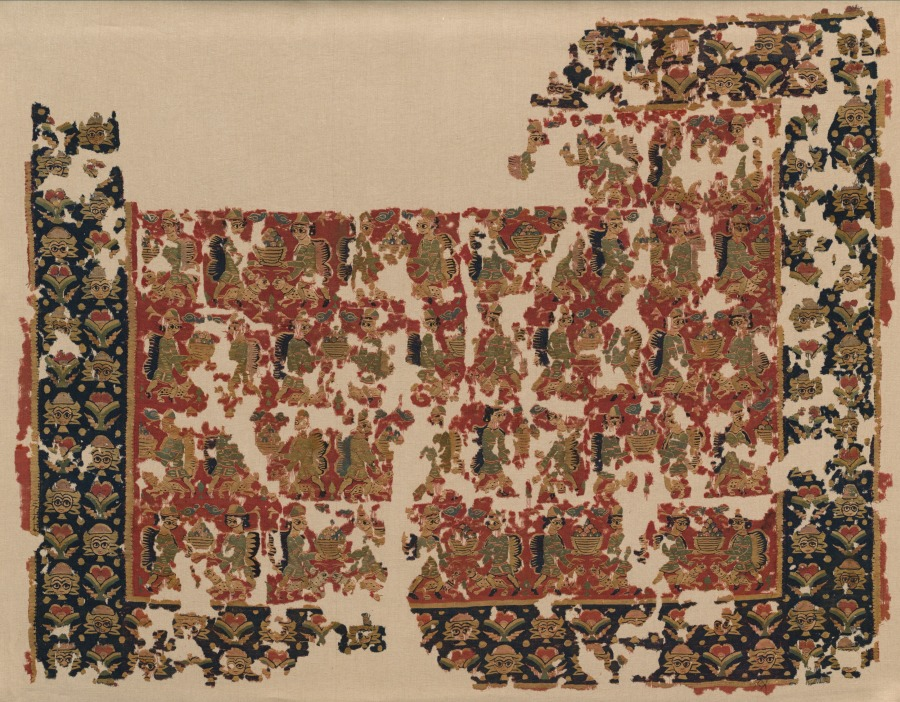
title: Fragment of a Large Hanging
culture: Egypt, Antinoë, Byzantine period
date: 500s CE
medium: tapestry weave (with plain tabby borders): wool and linen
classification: Textile